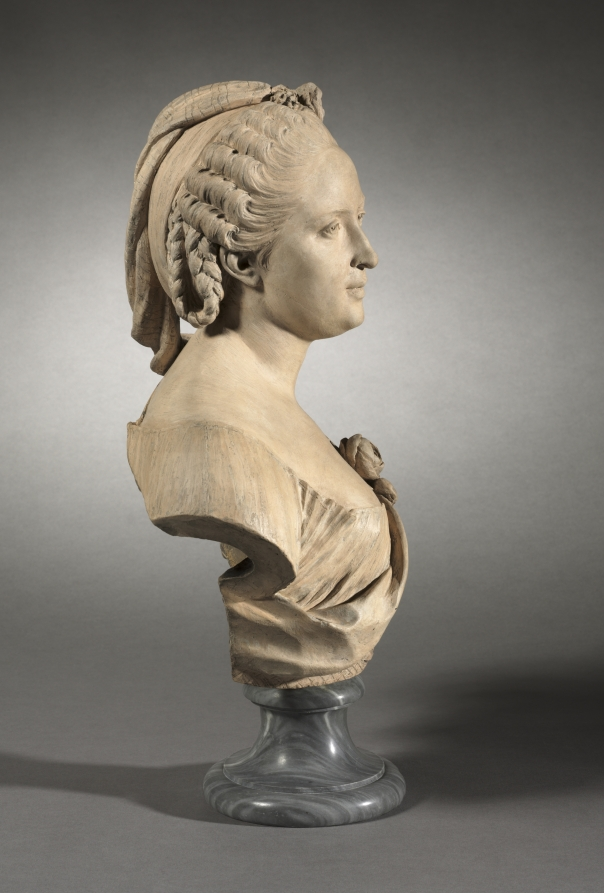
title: Portrait of a Woman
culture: France, 18th century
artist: Jean-Baptiste Defernex (French, c. 1729–1783)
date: 1759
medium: terracotta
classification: Sculpture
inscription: Signed on cut of left proper arm: "p[ar?] j. B, F, Defernex 1759"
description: The precise rendering of the costume and the unique facial features of the woman indicate this work is a true portrait, although the sitter has yet to be identified.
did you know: Art historians describe Defernex's portrait busts as "honest, unidealized, [and] quite free from gallant flattery."